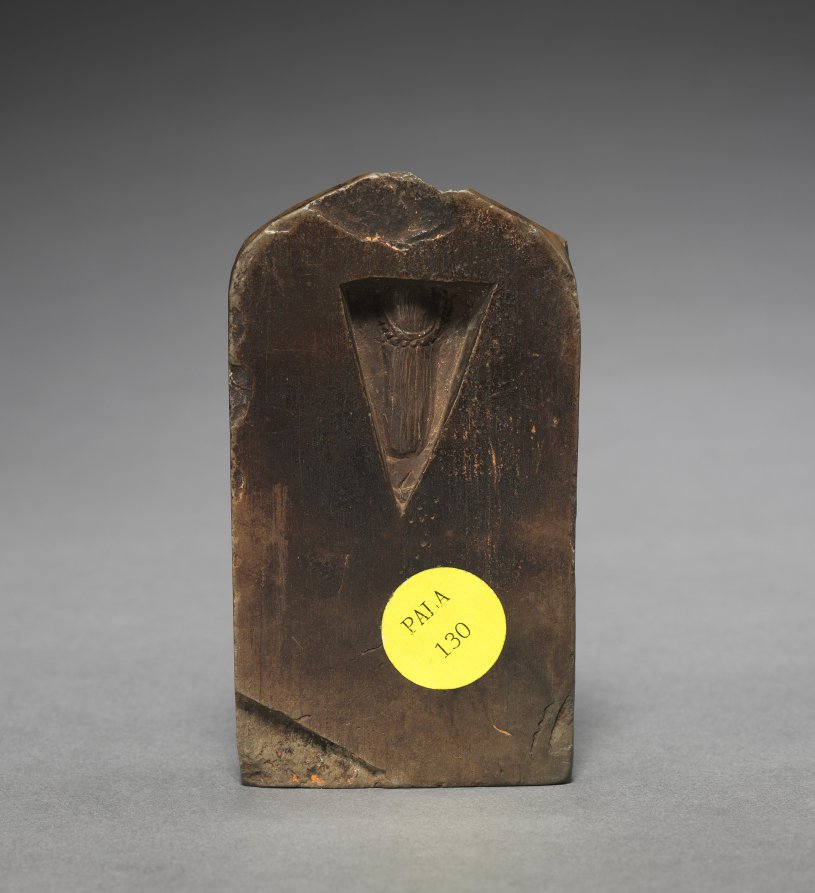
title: Vajravarahi: Dancing Tantric Buddhist Female Deity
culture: Nepal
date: 1000s–1100s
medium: Possibly kaolin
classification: Sculpture